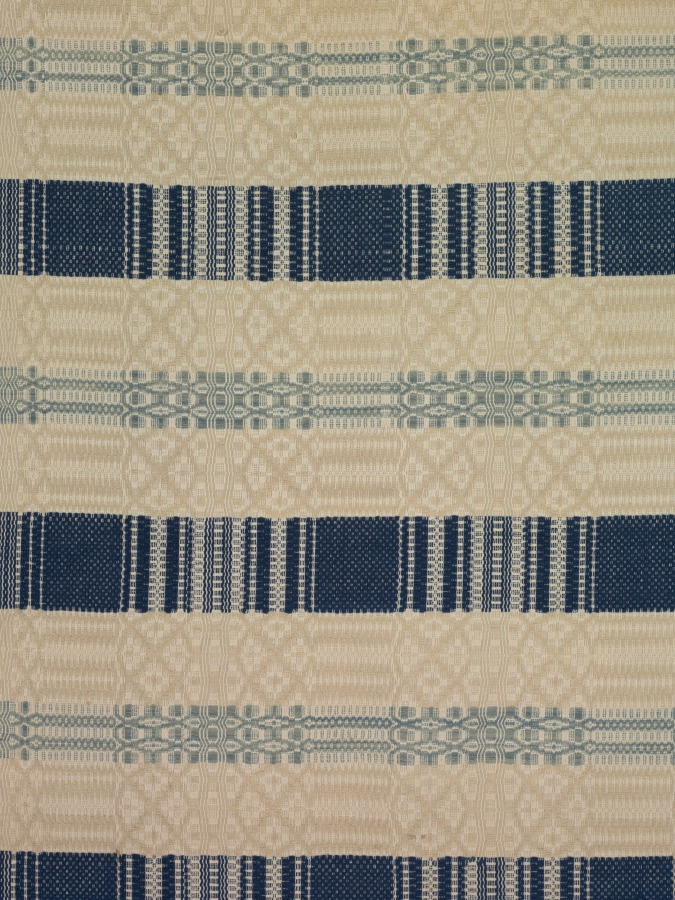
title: Woven Coverlet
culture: America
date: c. 1867–1868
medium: wool and cotton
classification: Textile